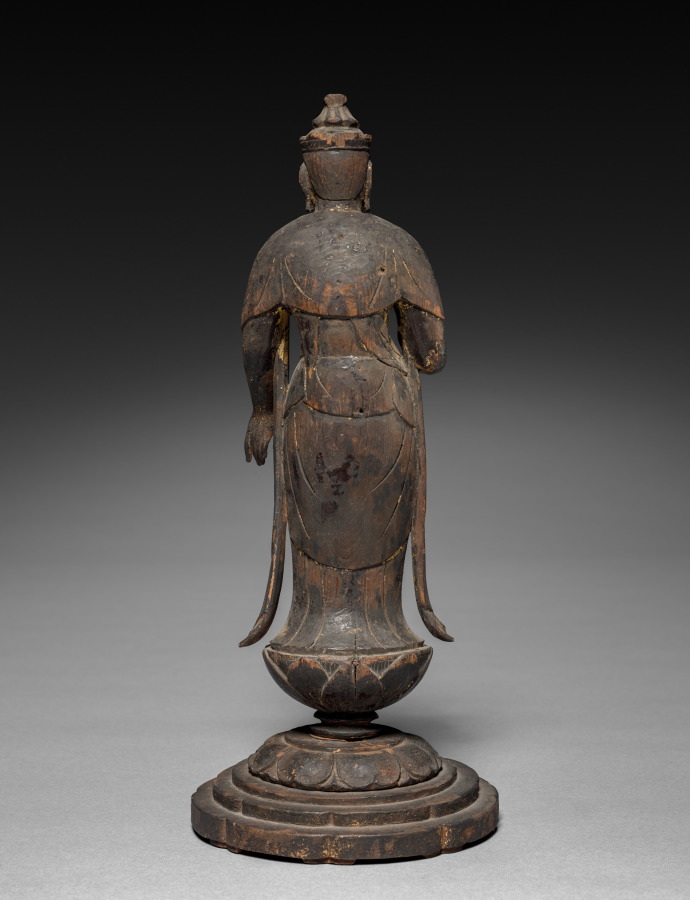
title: Kannon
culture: Japan, Heian period (794–1185) or Edo period (1615–1868)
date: 1000s or c. 1800–1868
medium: Wood with traces of lacquer and gilding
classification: Sculpture